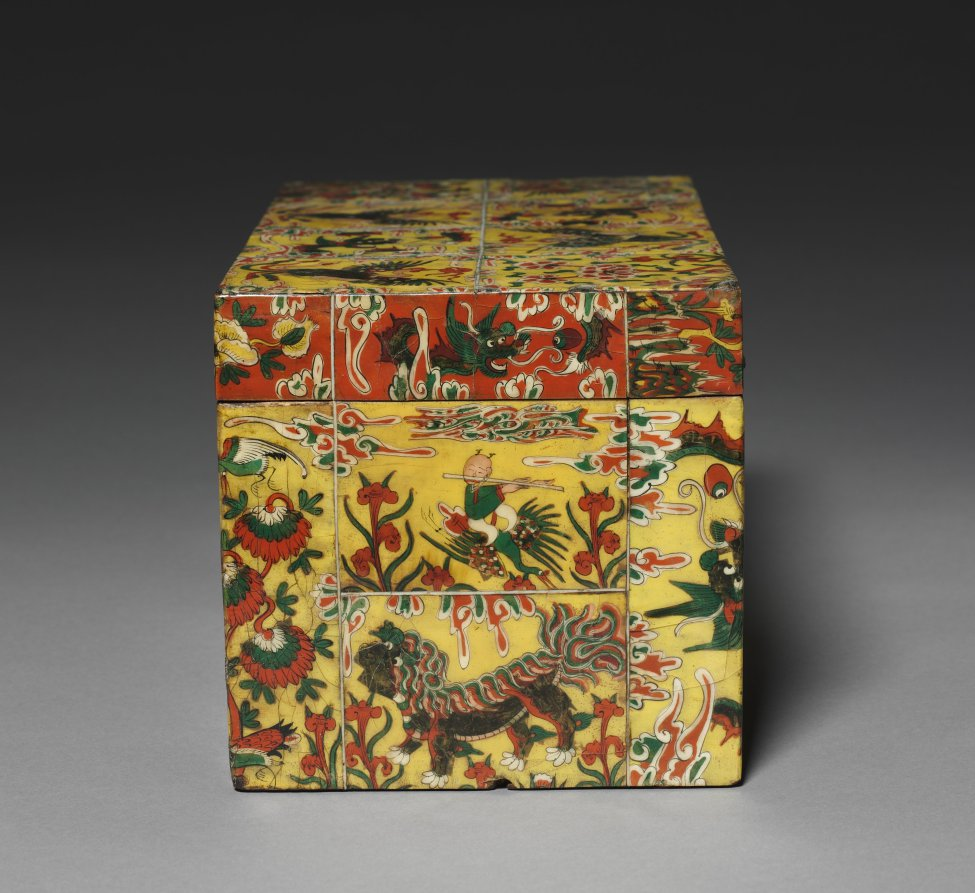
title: Box with Painted Oxhorn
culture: Korea, Joseon dynasty (1392–1910)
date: 1800s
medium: painted wood with flattened ox-horn inlay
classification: Miscellaneous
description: This box is colorfully decorated with the technique of oxhorn plating. The oxhorn was cut, soaked in water, boiled, and then pressed into thin translucent sheets. Since oxhorns are usually rather small, dozens of them were required to fully decorate even a small wooden object. This box is colorfully painted with the imagery of auspicious plants and animals such as dragons amid clouds, a white tiger under the pine tree, a grazing deer, and more. This kind of luxurious box was probably produced as a wedding gift.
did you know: This box is made of small flattened pieces of oxhorn. Since oxhorn is usually rather small, possibly dozens of them were used to fully decorate even a small wooden object like this box.